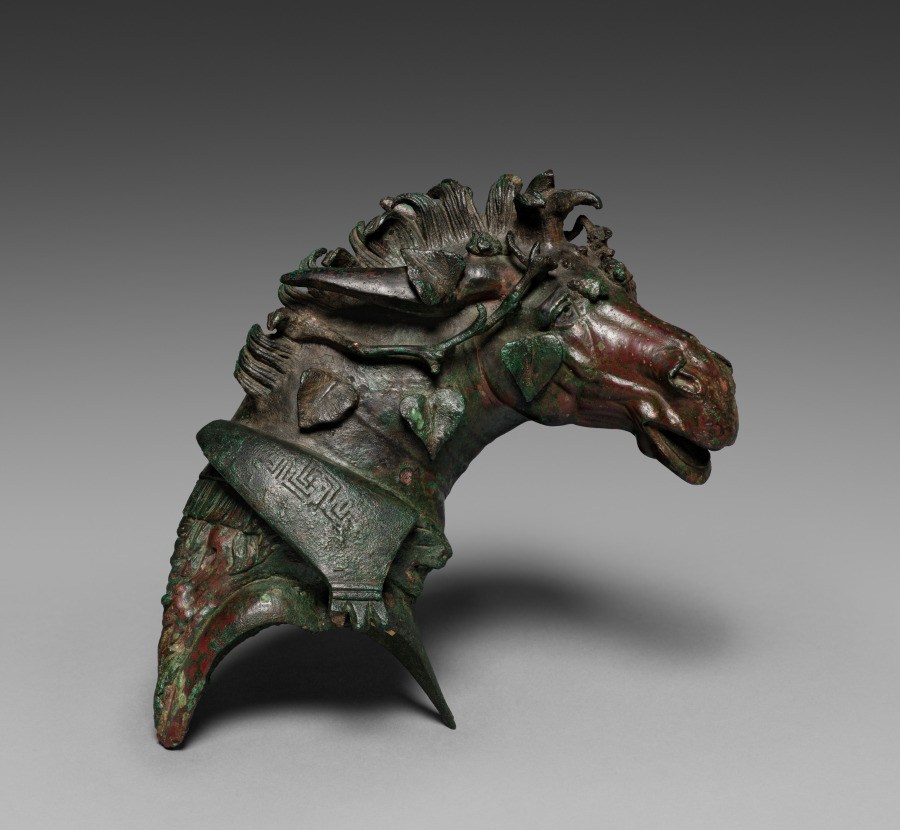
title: Mule-Head Attachment for a Couch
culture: Greece, Hellenistic period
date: 200–100 BCE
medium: bronze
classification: Sculpture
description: This bronze attachment in the shape of a mule’s head was once part of a fulcrum (armrest) for a banqueting couch. The mule’s mane flies upward, its mouth open and its ears pushed back against its head. The mule wears an ivy garland and a saddlecloth made from panther skin, two elements associated with the wine god Dionysos.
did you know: The pattern on the panther skin, called a meander, was also extremely popular on Greek pottery.